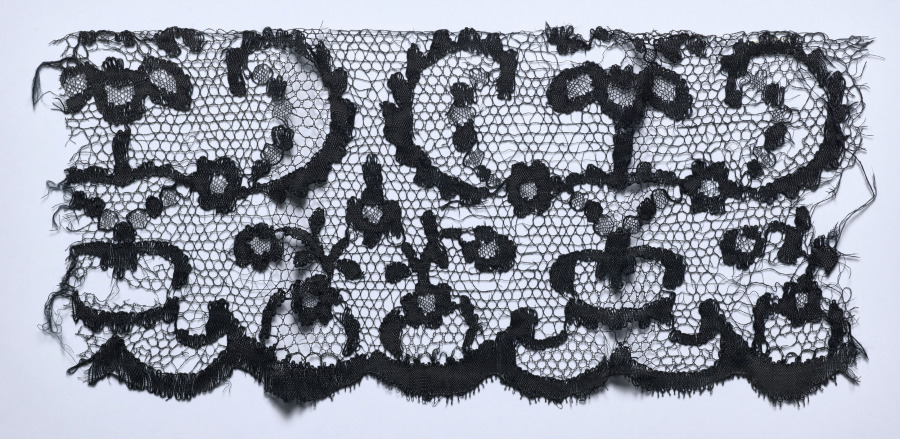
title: Lace Edging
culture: Spain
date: 1700s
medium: Silk: bobbin lace (blonde lace)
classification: Lace